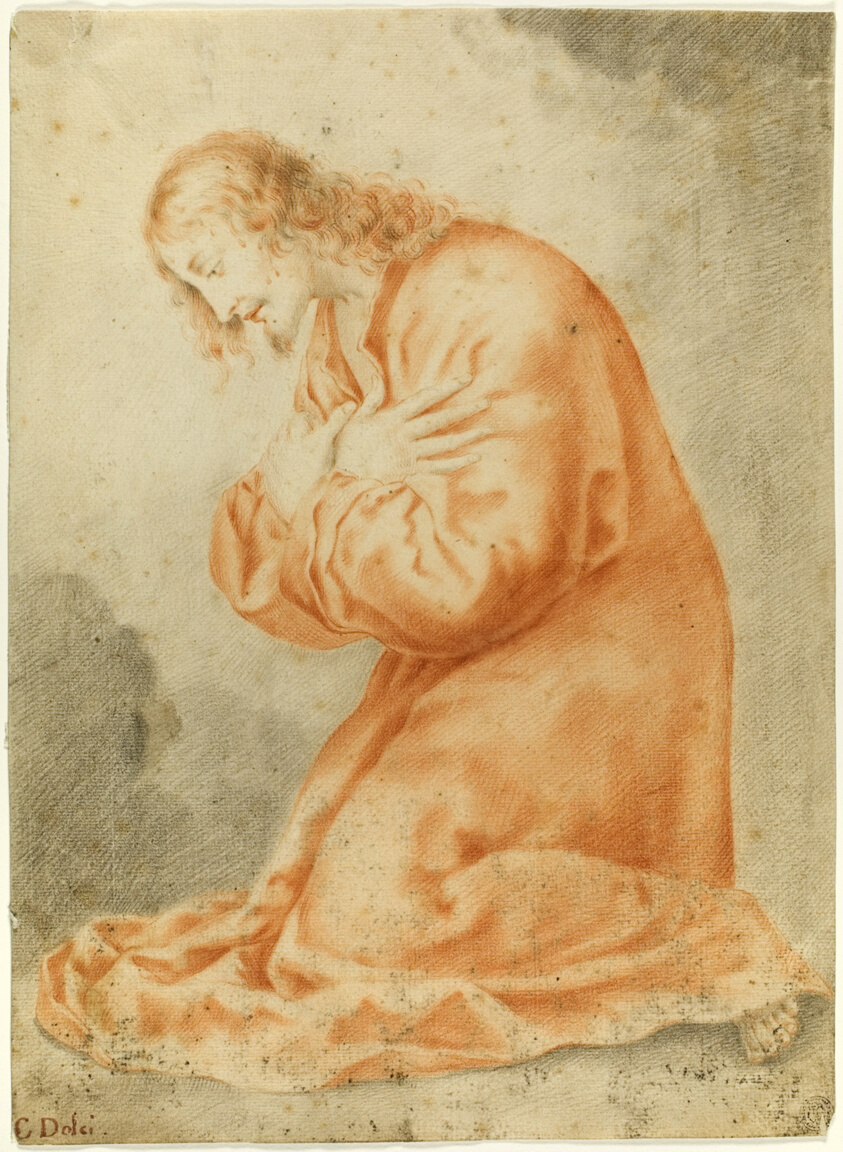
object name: Drawing and Watercolor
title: Christ Kneeling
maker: After Carlo Dolci; Italian, 1616-1686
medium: Red and black chalk on ivory laid paper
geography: Italy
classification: chalk; drawings (visual works); prints and drawing